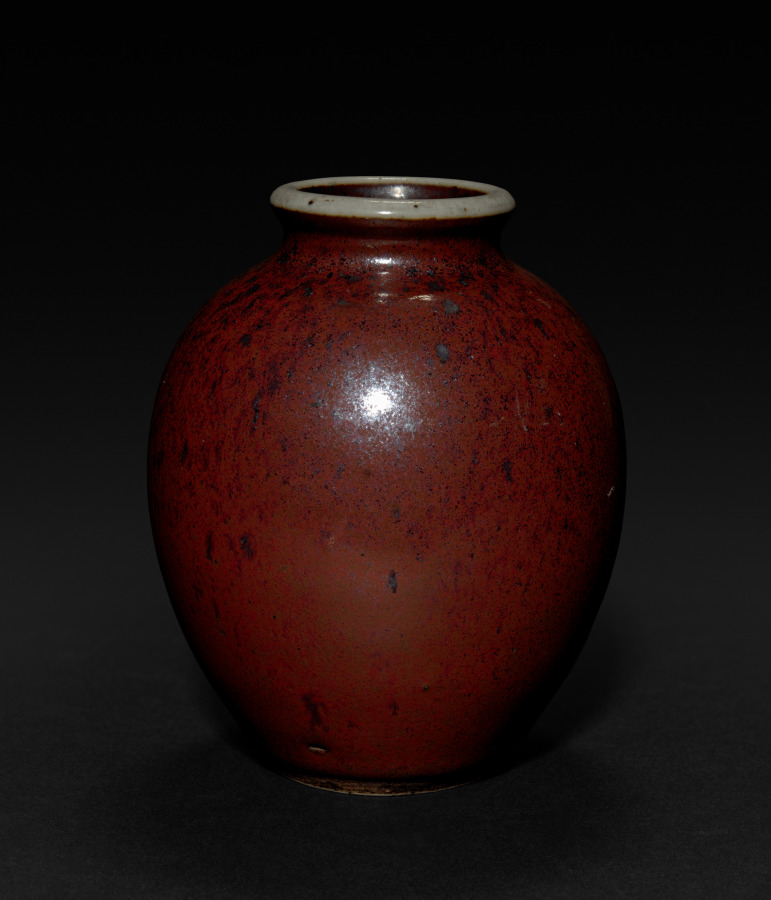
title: Jar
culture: China, Qing dynasty (1644–1911), Qianlong reign (1736–95)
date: 1736–95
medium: porcelain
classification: Ceramic